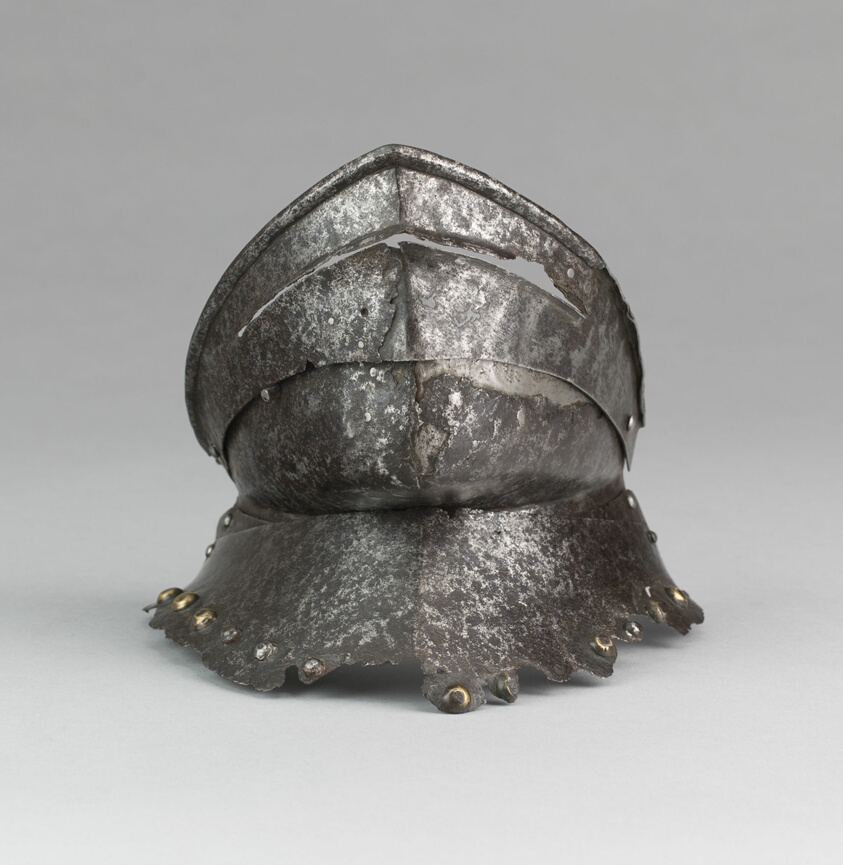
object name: Armor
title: Bevor ("Falling Buff")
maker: Spanish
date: c. 1500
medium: Steel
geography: Germany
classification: suit-element; armor; arms and armor